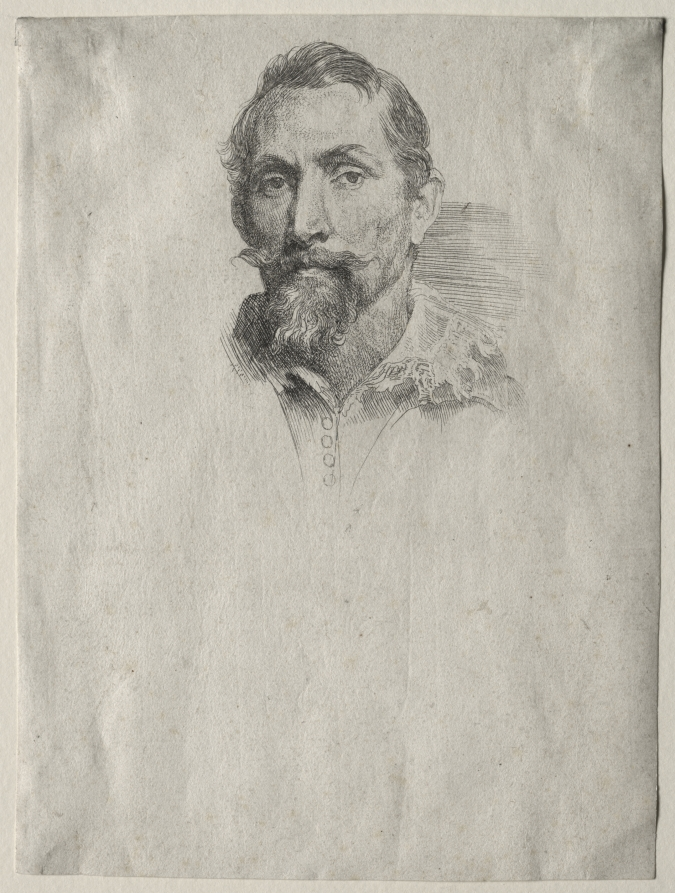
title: Frans Snyders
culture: Flanders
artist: Anthony van Dyck (Flemish, 1599–1641)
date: 1630–33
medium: etching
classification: Print